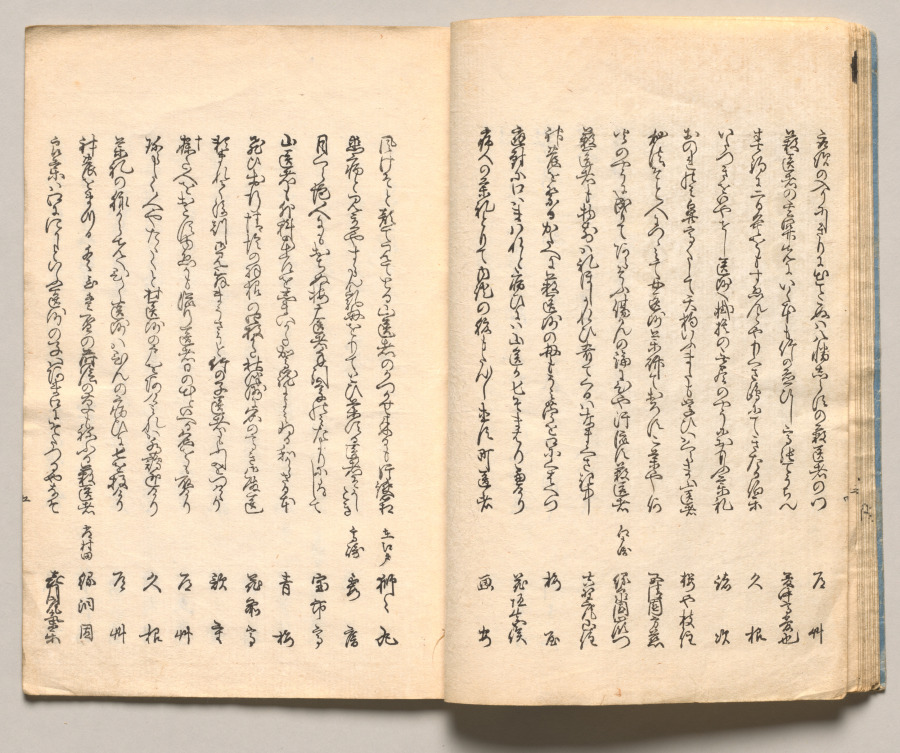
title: Spread Thirteen from Volume One of People of Japan in Light Verse (Kyōka)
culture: Japan, Edo period (1615–1868)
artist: Utagawa Hiroshige (Japanese, 1797–1858)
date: 1857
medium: Woodblock-printed book; ink and color on paper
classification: Bound Volume